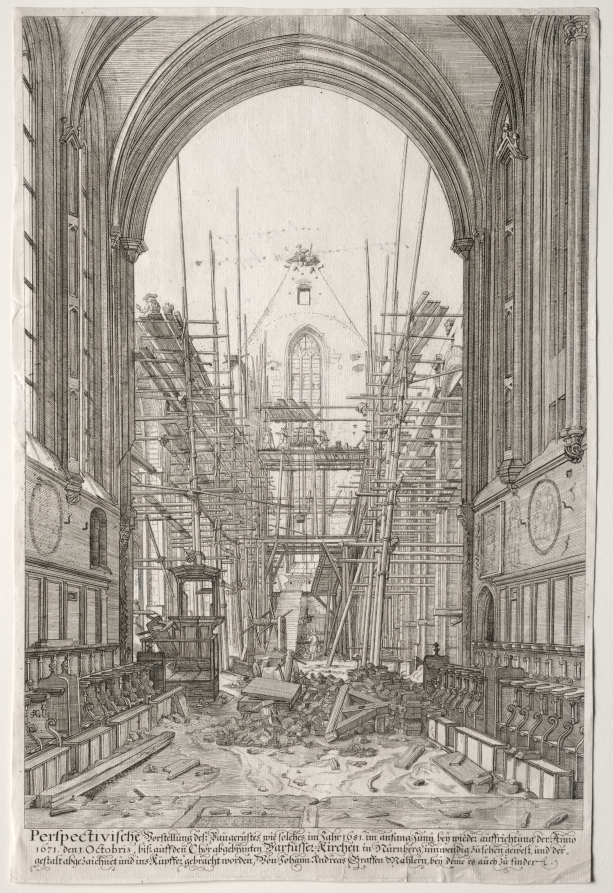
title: L'Art Ancien Zurich: View in the Church of the Franciscans, Barfüsser-Kirke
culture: Germany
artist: Johan Ulrich Krauss (German, 1655–1719)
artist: after Johann Andreas Graf (German, 1637–1701)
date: 1681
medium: etching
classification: Print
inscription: verso, in iron gall: inscription